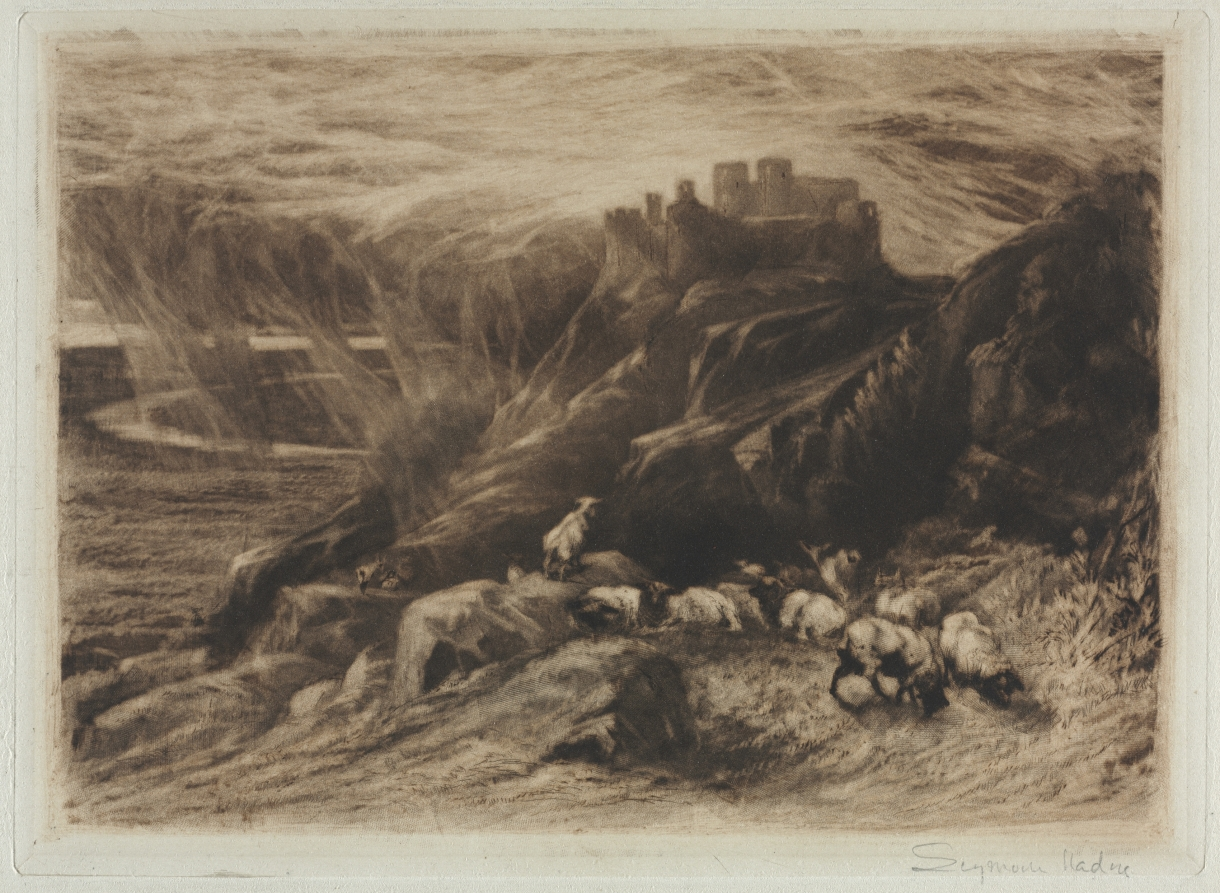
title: Harlech (A Second Plate)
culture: England, 19th century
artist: Francis Seymour Haden (British, 1818–1910)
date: 1880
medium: mezzotint, etching and drypoint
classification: Print